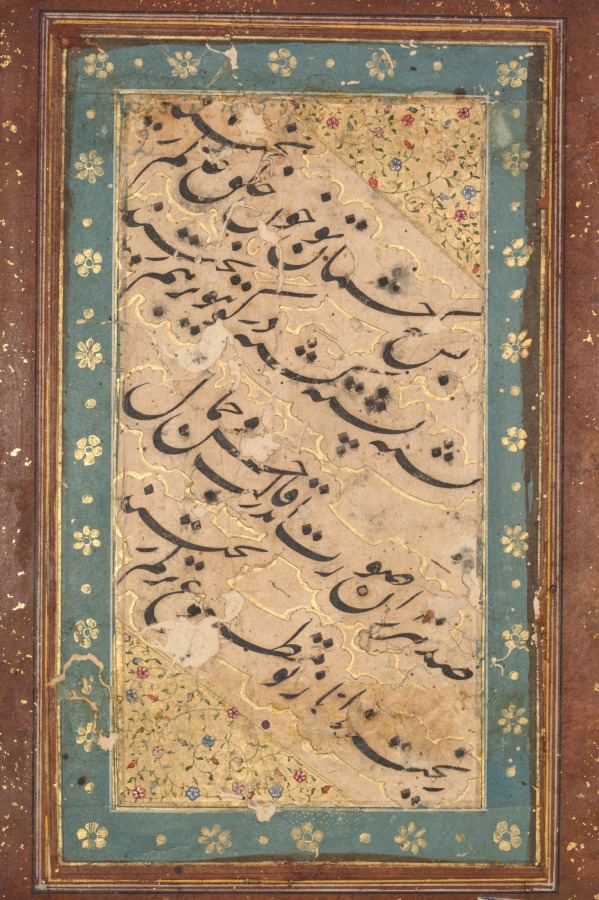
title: Calligraphy of a Quatrain (verso)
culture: India, Farrukhabad, Mughal, 18th century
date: c. 1760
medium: Gum tempera, ink, and gold on paper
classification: Calligraphy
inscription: Persian verse in nasta‘liq script: Your eyes have shed so much blood in the world at large/ That around your home corpses are strewn together in disorderly piles./ A hundred thousand faces were cast into molds of loveliness and beauty/ But rarely came out stamped as comely as you.